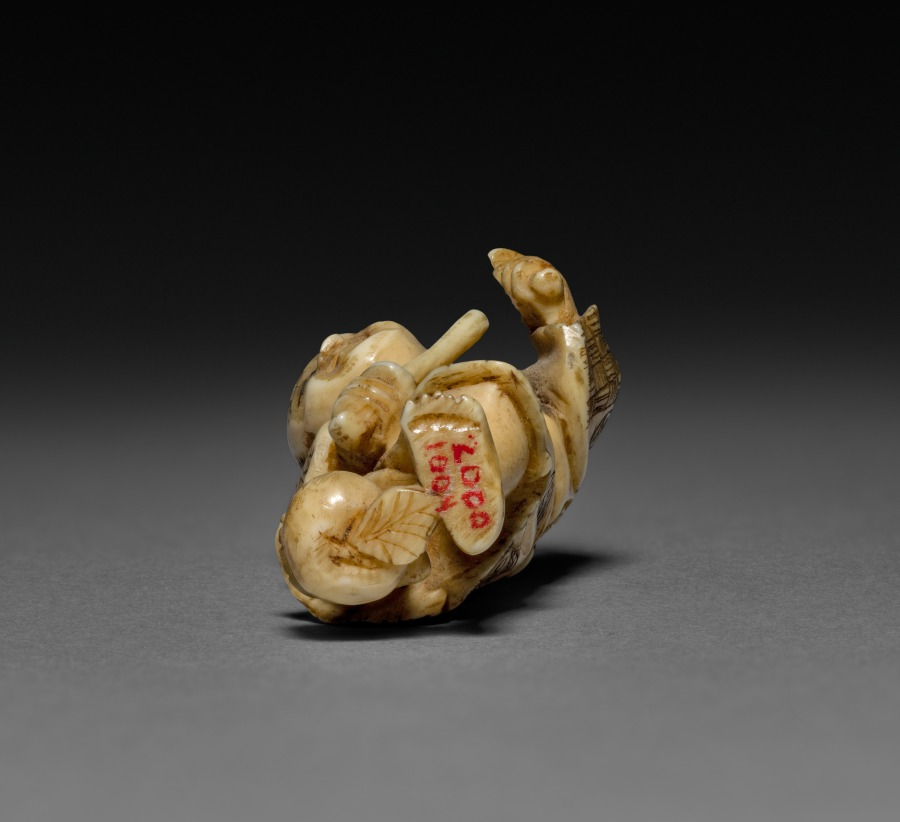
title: Netsuke of Man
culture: Japan, Meiji period (1868–1912)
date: 1900s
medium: ivory, pigment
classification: Ivory